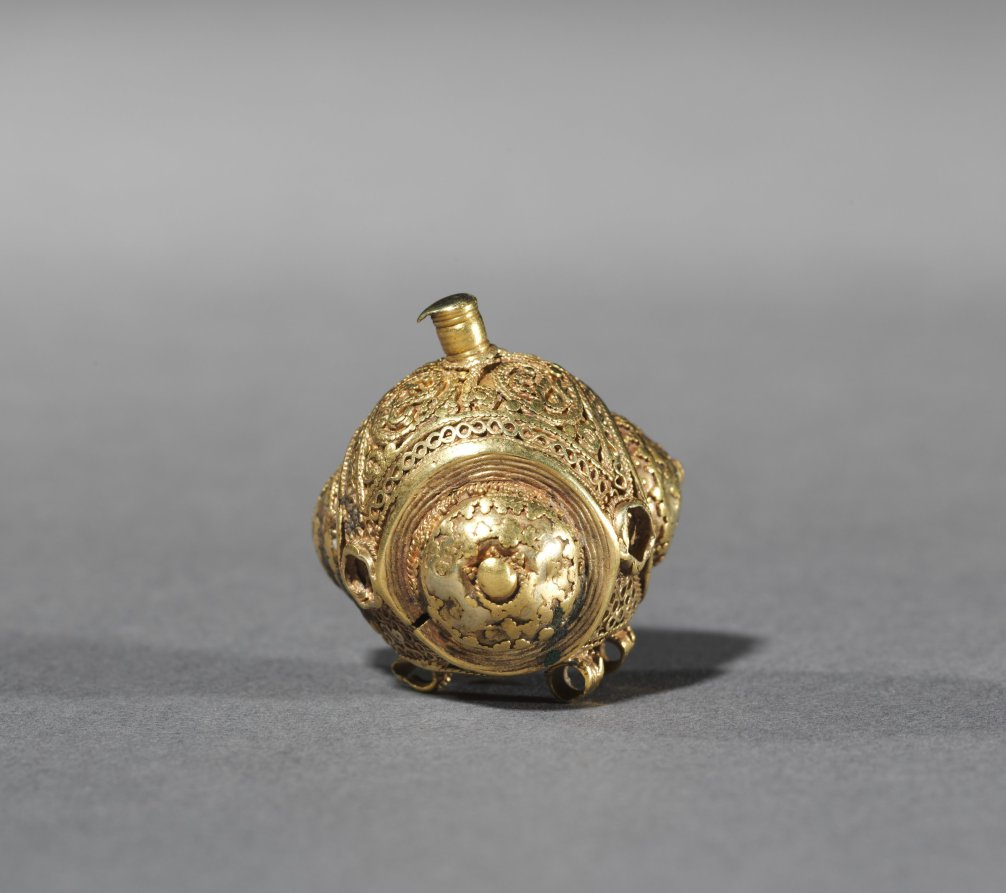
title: Button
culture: Iran, 10th–11th century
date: 900s–1000s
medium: gold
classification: Jewelry